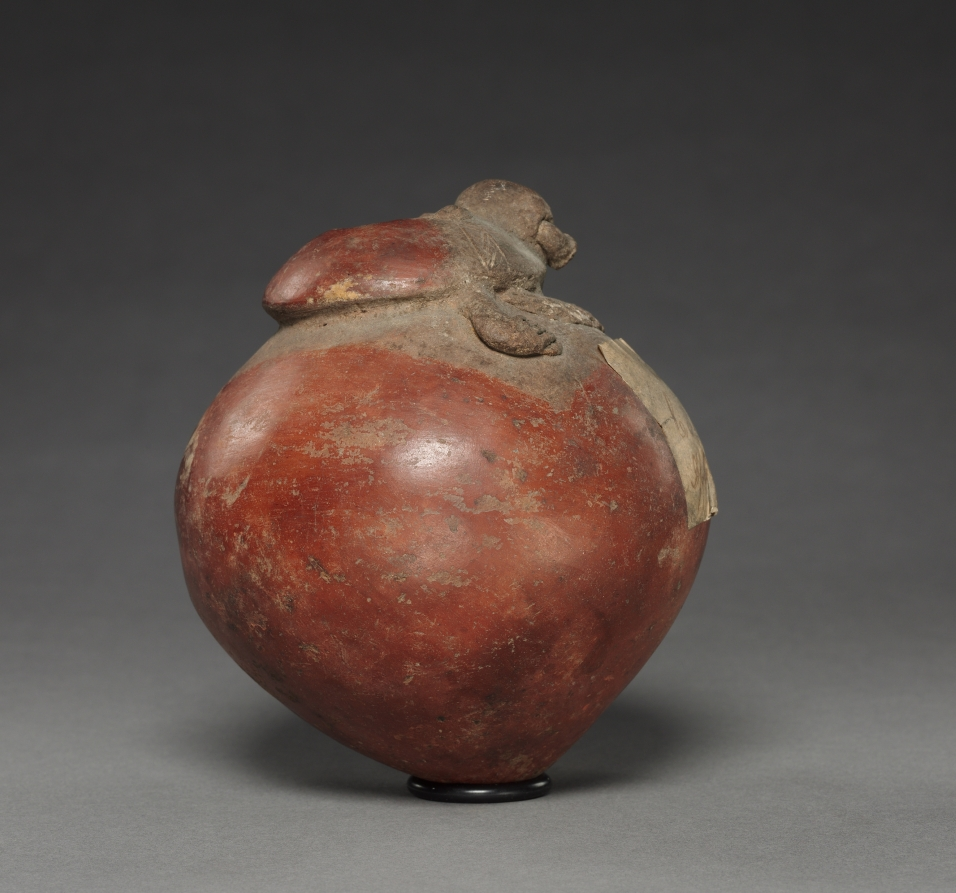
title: Dish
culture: Colombia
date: before 1550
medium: pottery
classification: Ceramic